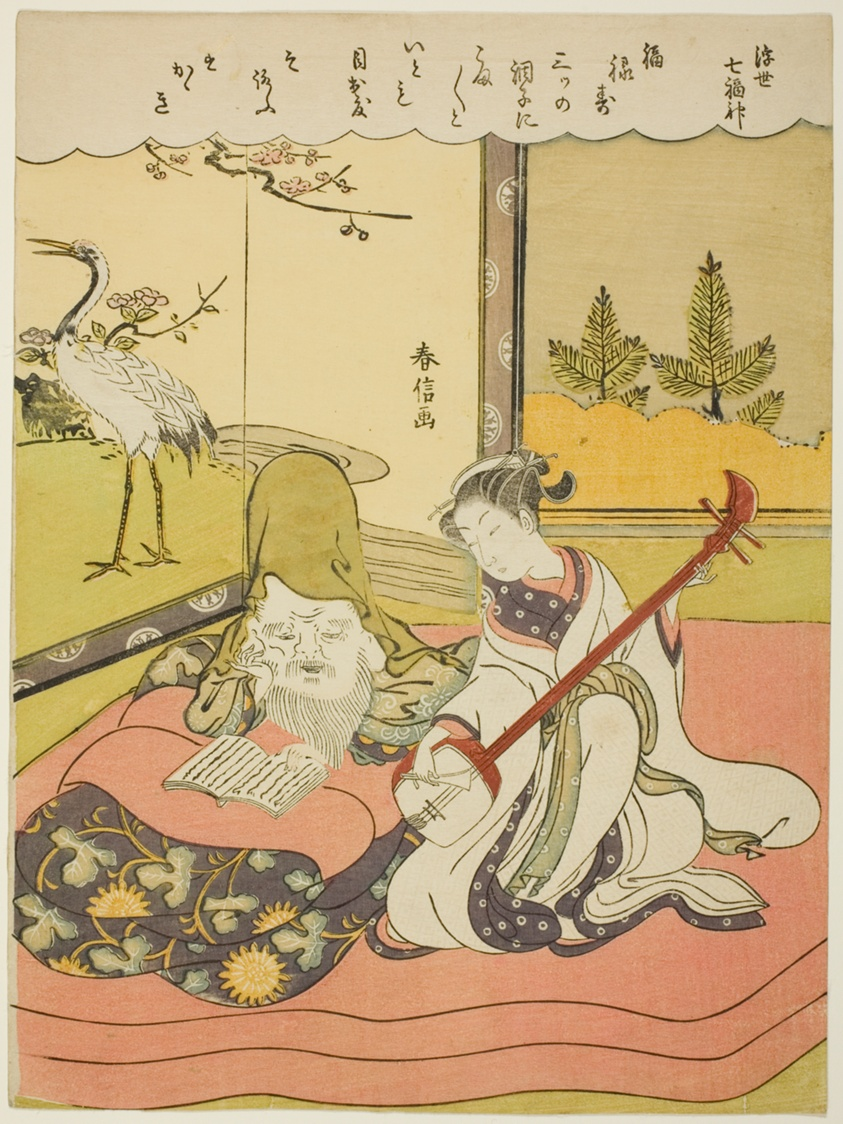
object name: Print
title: Fukurokuju, from the series "The Seven Gods of Good Luck in the Floating World (Ukiyo Shichi Fukujin)"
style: Japanese (culture or style)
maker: Suzuki Harunobu 鈴木 春信; Japanese, 1725 (?)-1770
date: c. 1769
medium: Color woodblock print; chuban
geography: Japan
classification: woodblock print; print; asian art